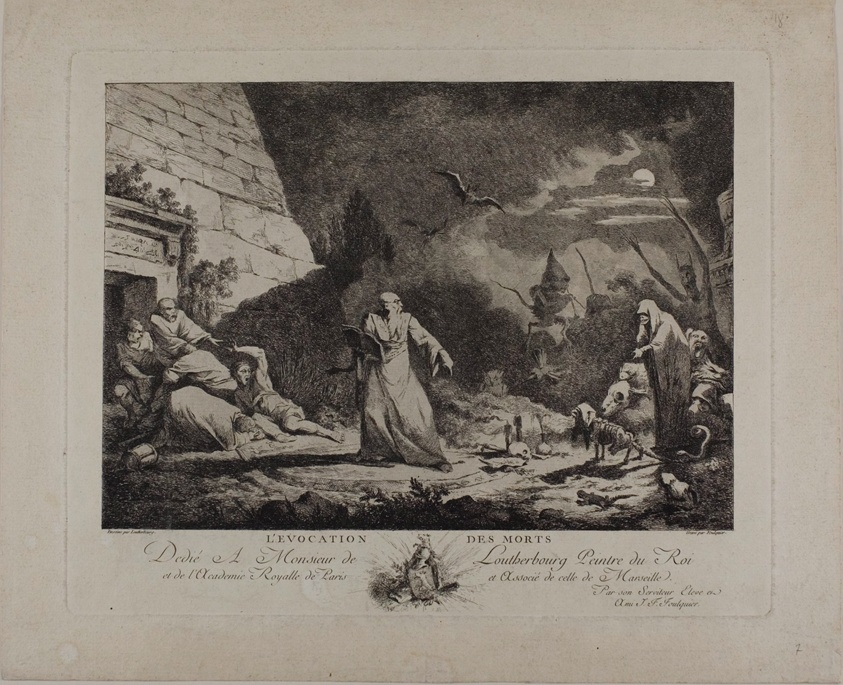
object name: Print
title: Evocation of the Dead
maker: Joseph Francoise Foulquier (French, 1749-1812); after Philip Jacques de Loutherbourg (French, 1740-1812)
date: 1770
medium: Etching and aquatint on paper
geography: France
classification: etching; print; prints and drawing